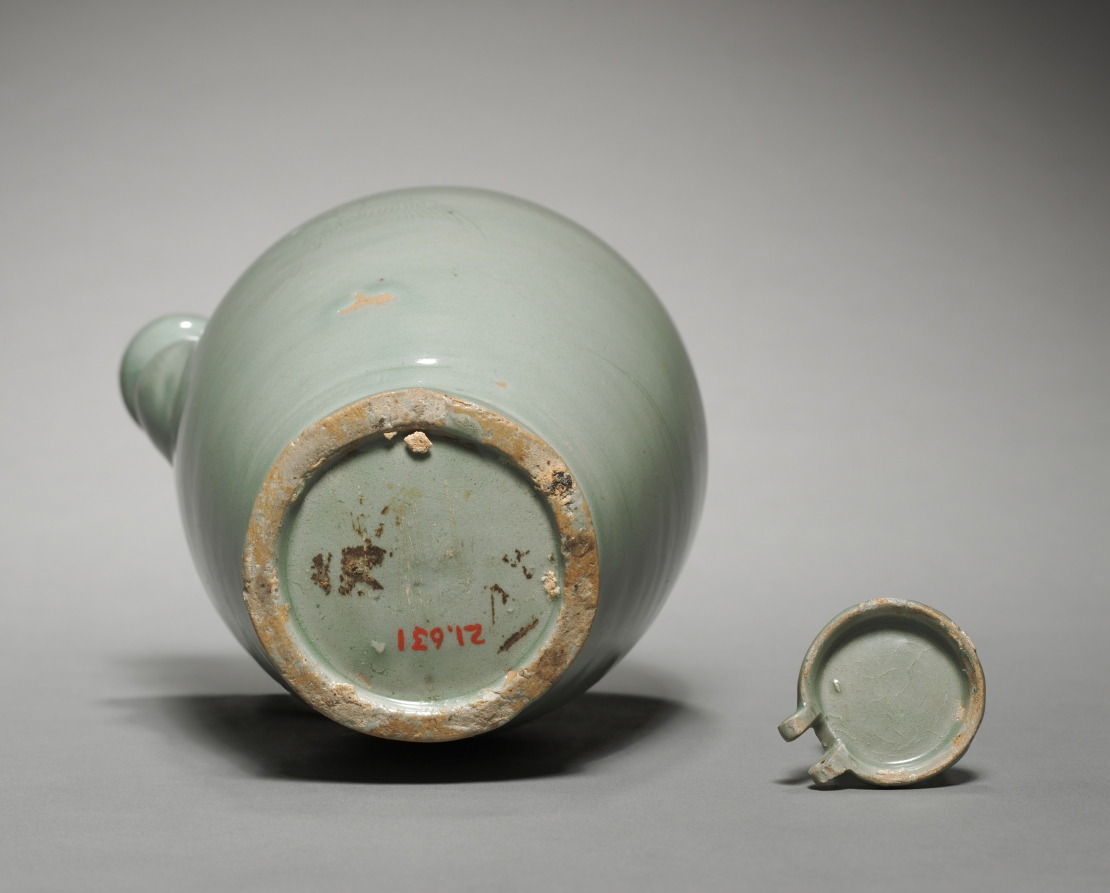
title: Water Ewer for Rituals (Kundika) with Incised Parrot Design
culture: Korea, Goryeo dynasty (918–1392)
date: 1100s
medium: stoneware with celadon glaze, incised and carved decoration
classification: Ceramic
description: This distinctively shaped celadon vessel is a kundika. With a spout on one side, this type of vessel is often used in Buddhist purification rituals. Unlike most existing examples that have an image of a willow tree, this work has a rare flying phoenix design incised on its surface. During the Goryeo period (918-1392), about 260 kilns operated in mainly Jeolla and Chungcheong provinces, meeting a soaring demand for high-end products like this example.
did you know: Unlike most existing examples that have an image of a willow tree or lotus pond, this ewer bears an image of flying parrots delicately incised on its surface.